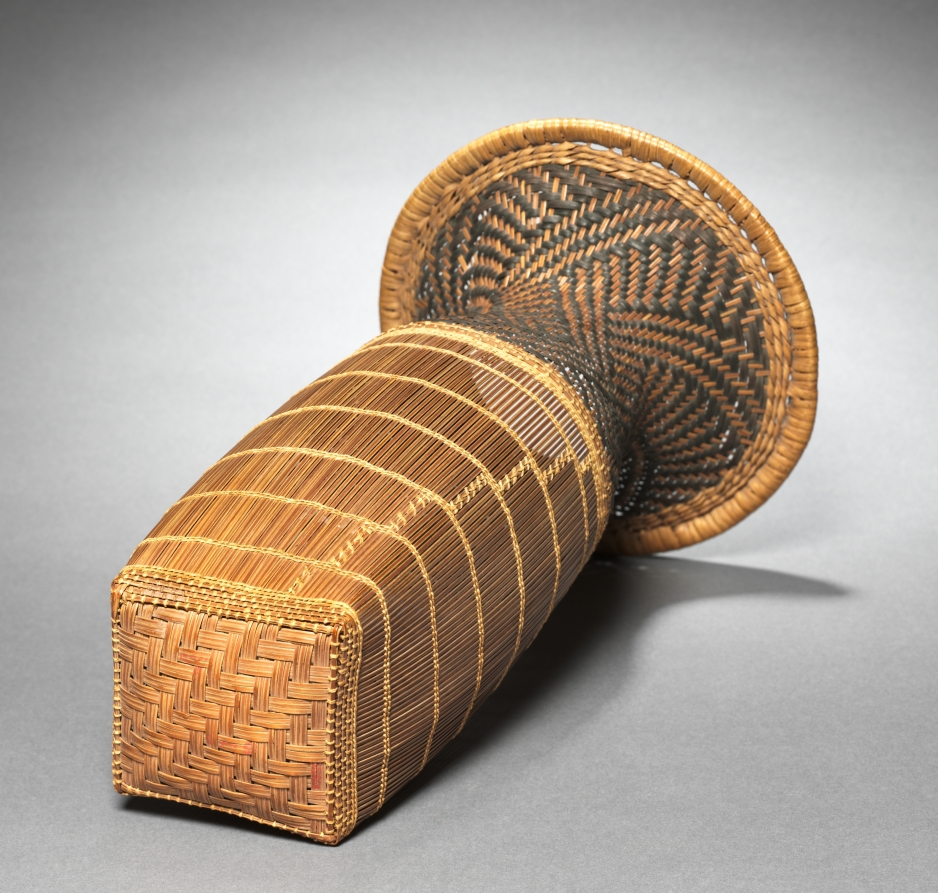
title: Sifting Basket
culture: Africa, Central Africa, Democratic Republic of the Congo or Angola, possibly Chokwe-style maker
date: before 1915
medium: Plant fibers and dye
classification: Tool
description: The Chokwe pounded maize into a course flour and then sifted it in order to separate the finest flour for cooking. This domestic object exhibits a refined, elegant artistry in its proportion, shape, and integrated woven textures.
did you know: F. M. Rapp––who acquired this basket in Congo while working for a diamond mine––attended the Case School of Applied Science in Cleveland.